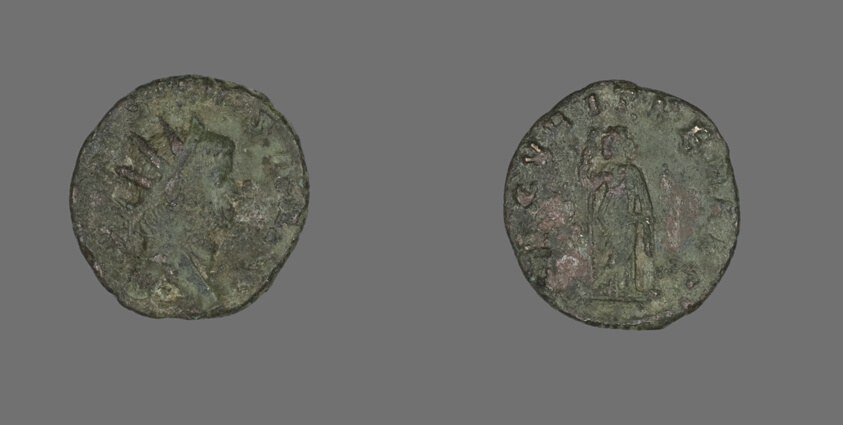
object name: Coin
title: Antoninianus (Coin) Portraying Emperor Gallienus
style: roman (ancient, style or period)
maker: Roman, minted in Rome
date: 260-268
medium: Billon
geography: Roman Empire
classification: coin; ancient art